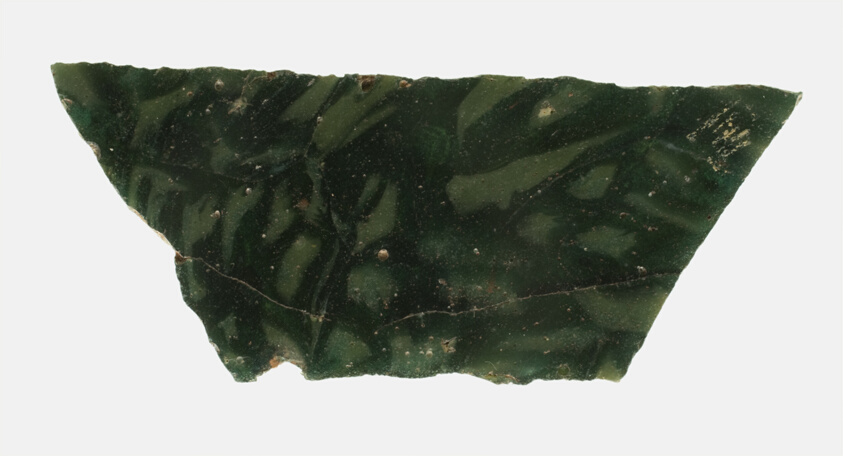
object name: Decorative Arts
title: Fragment of an Inlay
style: roman (ancient, style or period), ancient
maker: Roman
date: 1st century BCE–1st century CE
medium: Glass, mosaic glass technique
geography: Roman Empire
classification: fragment; decorative arts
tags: decoration